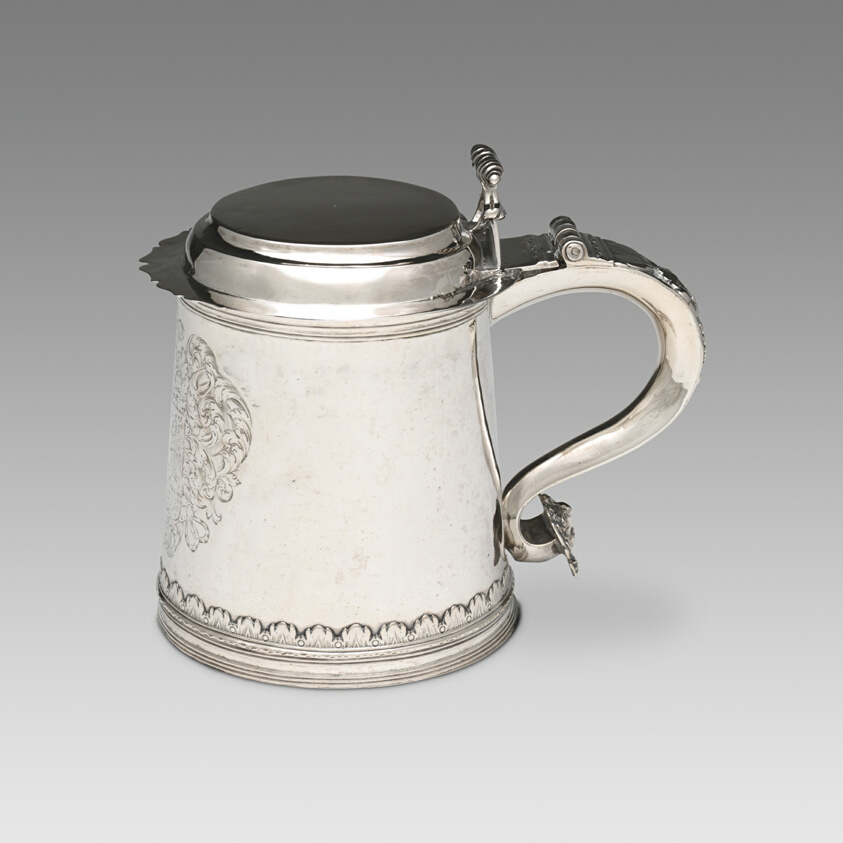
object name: Metalwork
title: Tankard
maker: Cornelius Kierstede; American, 1674–1757; New York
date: 1700–20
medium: Silver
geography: New York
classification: drinking vessel; silver; american decorative arts; american arts; decorative arts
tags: dining, drinking